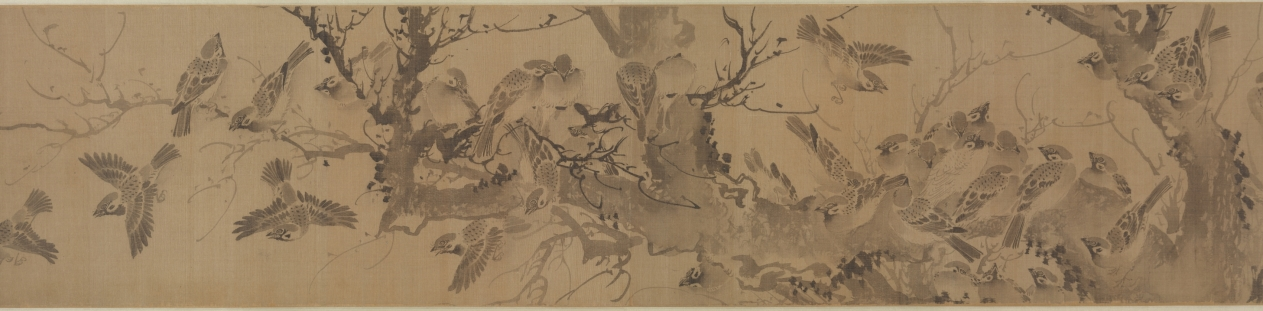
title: A Hundred Sparrows in a Lofty Grove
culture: China, Ming dynasty (1368–1644)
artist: attributed to Lin Liang (Chinese, 1416–1480)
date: 1368–1644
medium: handscroll; ink on silk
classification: Painting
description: Sparrows engaged in all kinds of activities frolic amid leafy branches, blades of grass, rocks, and a waterfall. As our eyes move over the scroll, the artist engages us in enjoying the sparrows’ carefree movements in a natural setting. The charming birds were painted from close observation in swift and fluent brushstrokes. Sparrows are a common bird and in Chinese painting they often represent the commoner in human society as opposed to the noble pheasant or peacock representative of the ruling class.